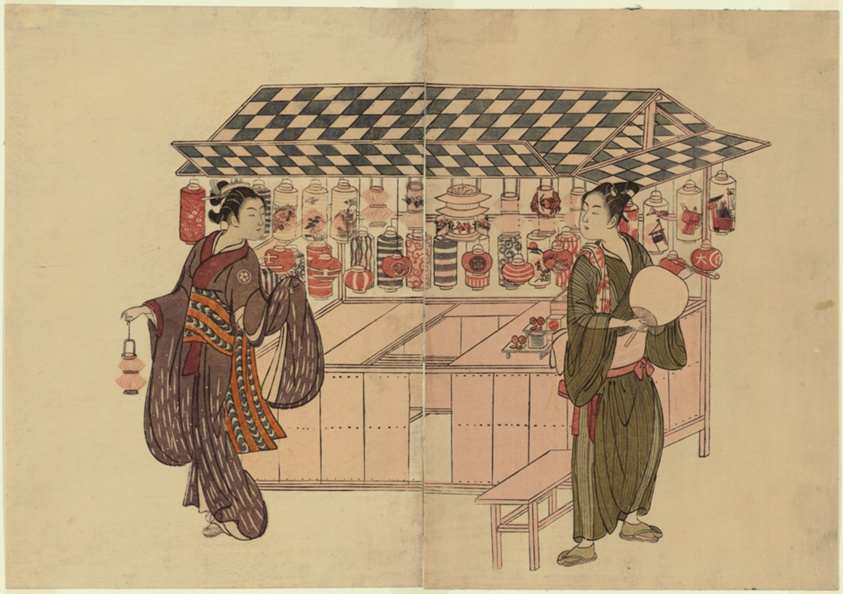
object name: Print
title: The Lantern Shop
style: Japanese (culture or style)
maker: Attributed to Suzuki Harunobu 鈴木 春信; Japanese, 1725 (?)–1770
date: c. 1765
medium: Color woodblock print; chuban diptych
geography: Japan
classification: woodblock print; print; asian art